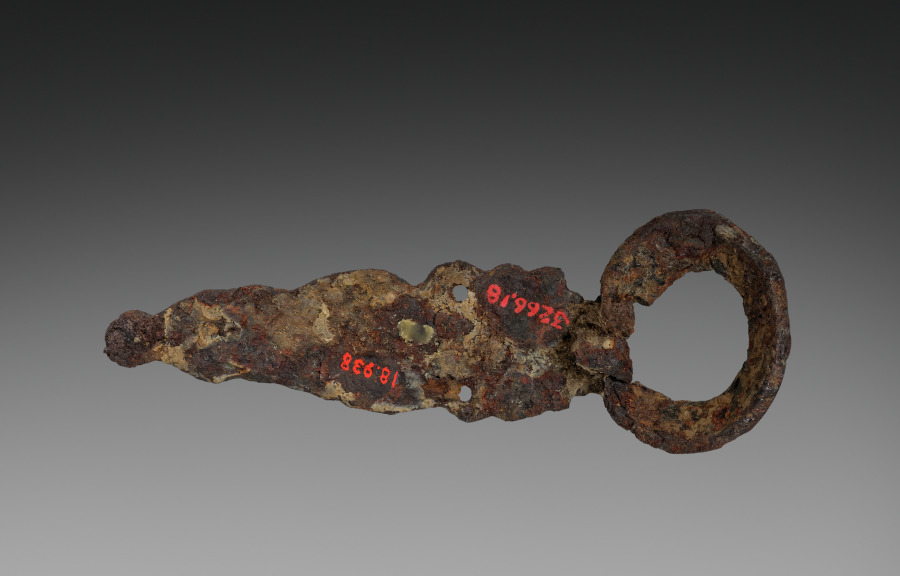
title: Buckle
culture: Merovingian, Burgundian, Migration period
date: 600s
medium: iron with gold and silver overlay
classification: Jewelry